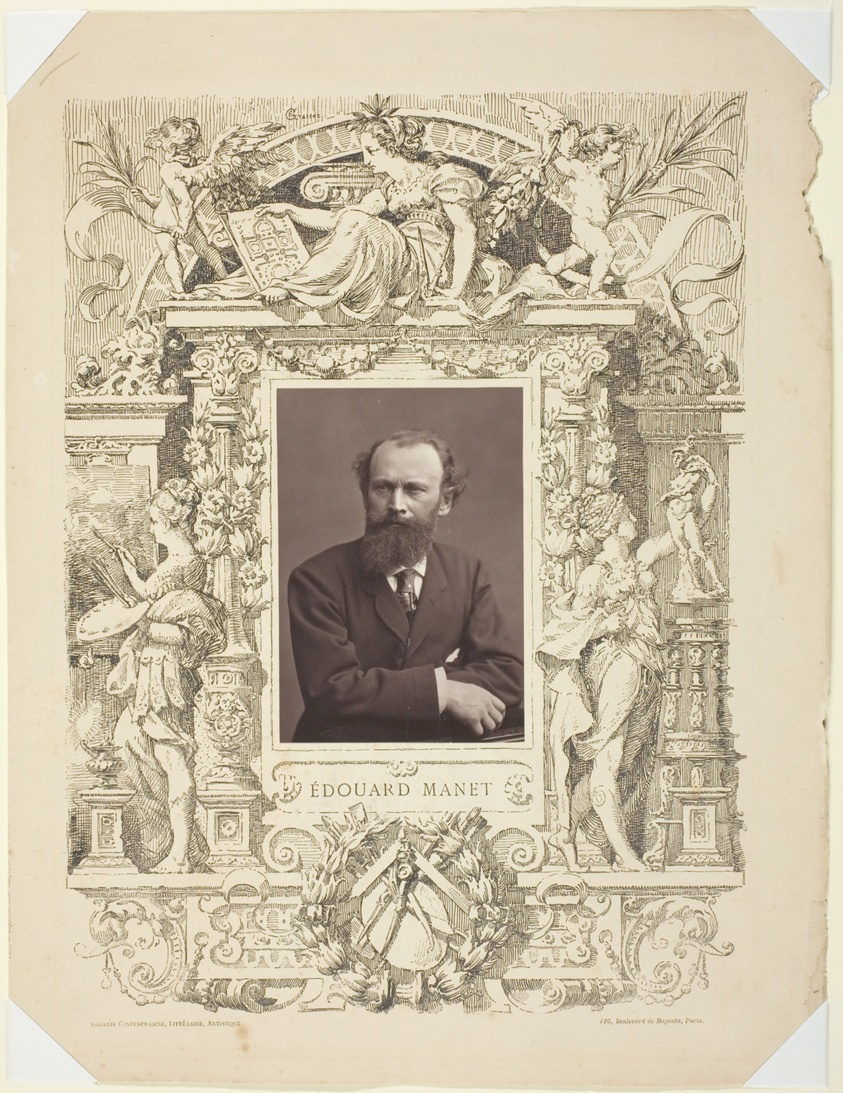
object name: Photograph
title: Édouard Manet (French painter, 1832-1883)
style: 19th century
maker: Nadar (Gaspard Félix Tournachon) (French, 1820–1910)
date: 1865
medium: Woodburytype, from the periodical “Galerie Contemporaine Littéraire, Artistique” (1876), volume 1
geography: France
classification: woodburytype; photomechanical process; photography; photograph